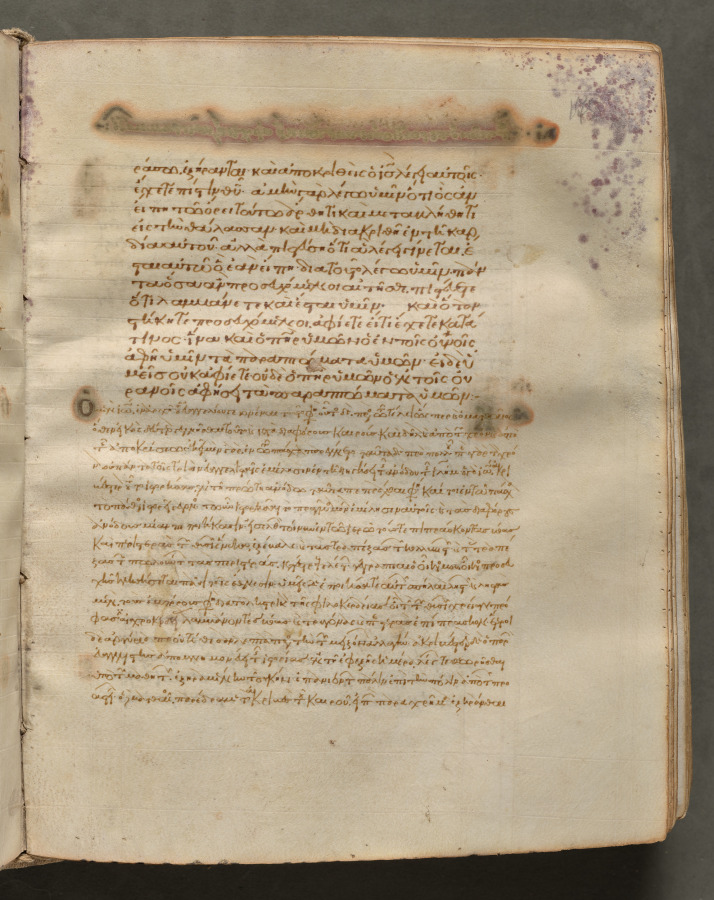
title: Text, folio 175 (recto), from a Gospel Book with Commentaries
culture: Byzantium, Constantinople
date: c. 1000–1100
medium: ink, tempera, and gold on vellum; leather binding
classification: Bound Volume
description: Each of the four gospels in this book opens on a page with brilliantly illuminated borders depicting the author of the text as well as birds-principally peacocks, symbols of the immortality of the soul-and fountains, representing the fountain of life and the salvation of the soul. This volume consists of 428 leaves with texts in Greek. Its level of sophistication suggests that it was probably written and decorated in a monastery in Constantinople.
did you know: Gospel Books were carried in procession through Byzantine churches.